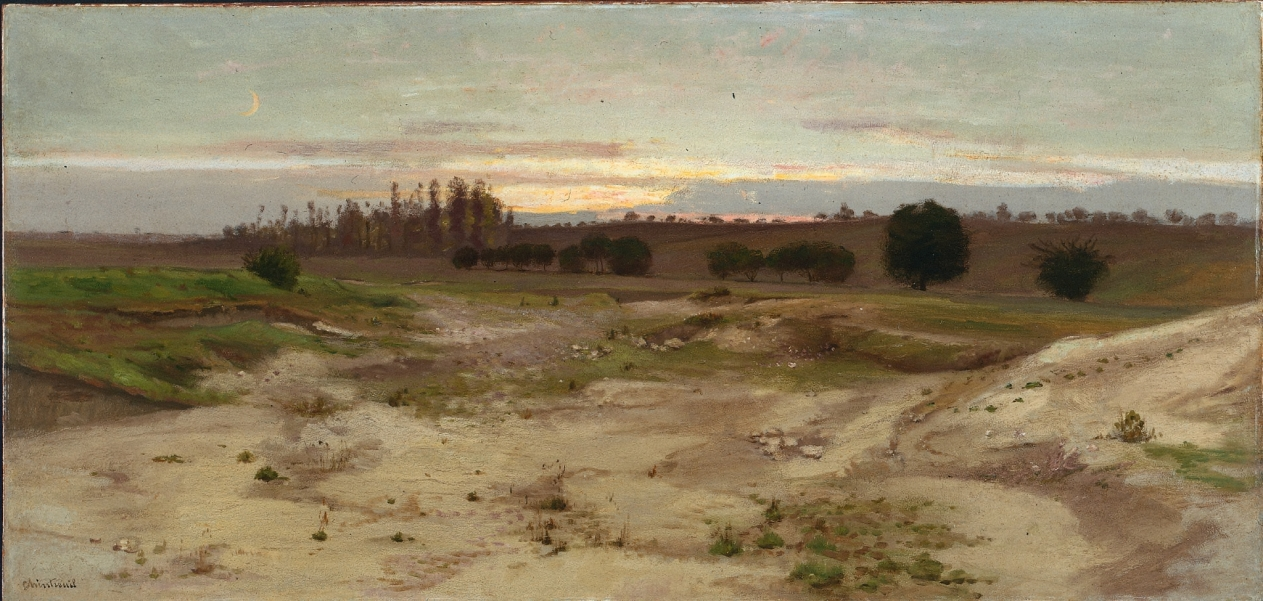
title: The Marl Pit at Mulcent: Evening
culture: France, 19th century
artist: Antoine Chintreuil (French, 1814–1873)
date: after 1857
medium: oil on paper, mounted to cardboard, mounted to plywood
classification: Painting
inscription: Signed lower left: Chintreuil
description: Marl is a crumbly mixture of clays, calcium, and magnesium carbonates, often used as fertilizer for lime-deficient soils.